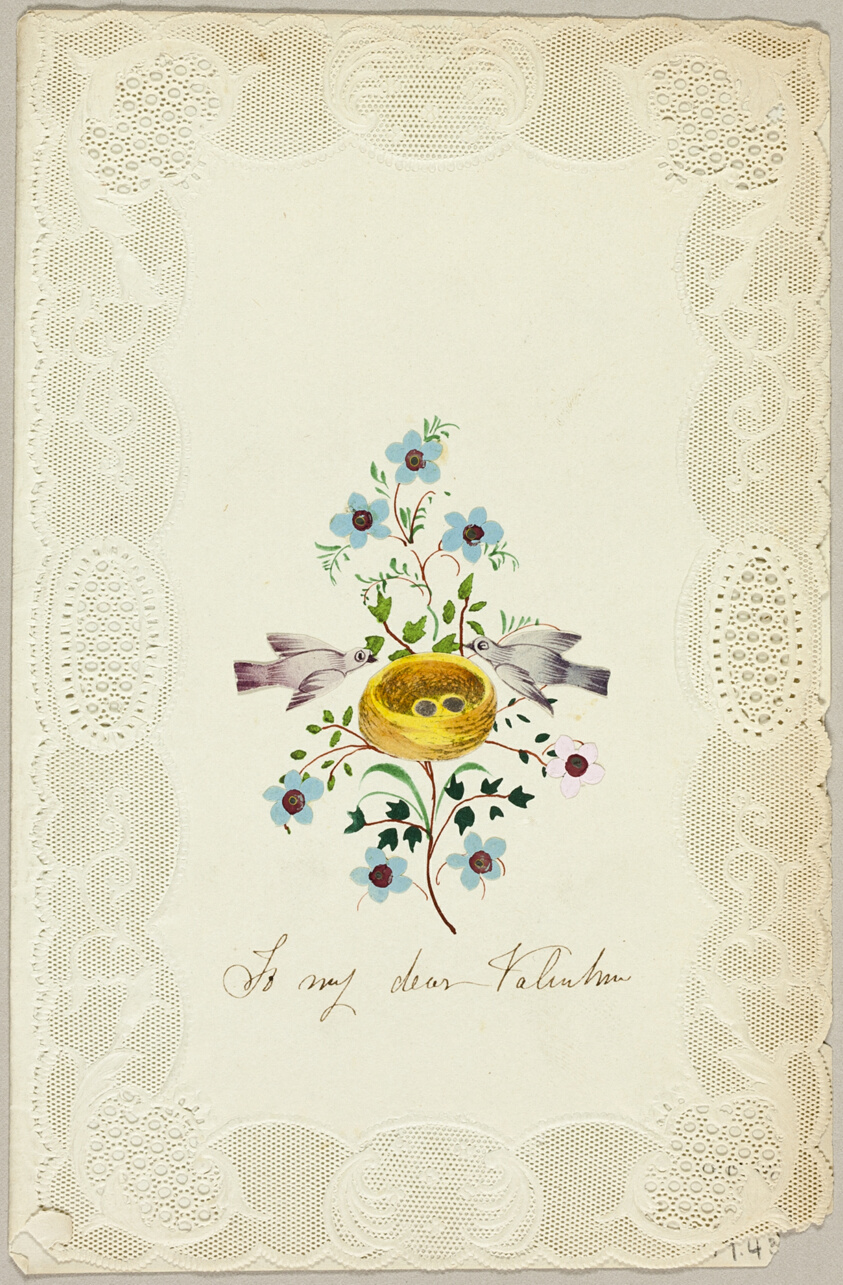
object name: Drawing and Watercolor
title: To My Dear Valentine (valentine)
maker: George Kershaw (English, 19th century)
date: c. 1840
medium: Collaged elements with watercolor and pen and brown ink on cut and embossed ivory wove paper (lace)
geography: England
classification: valentine; prints and drawing; paper